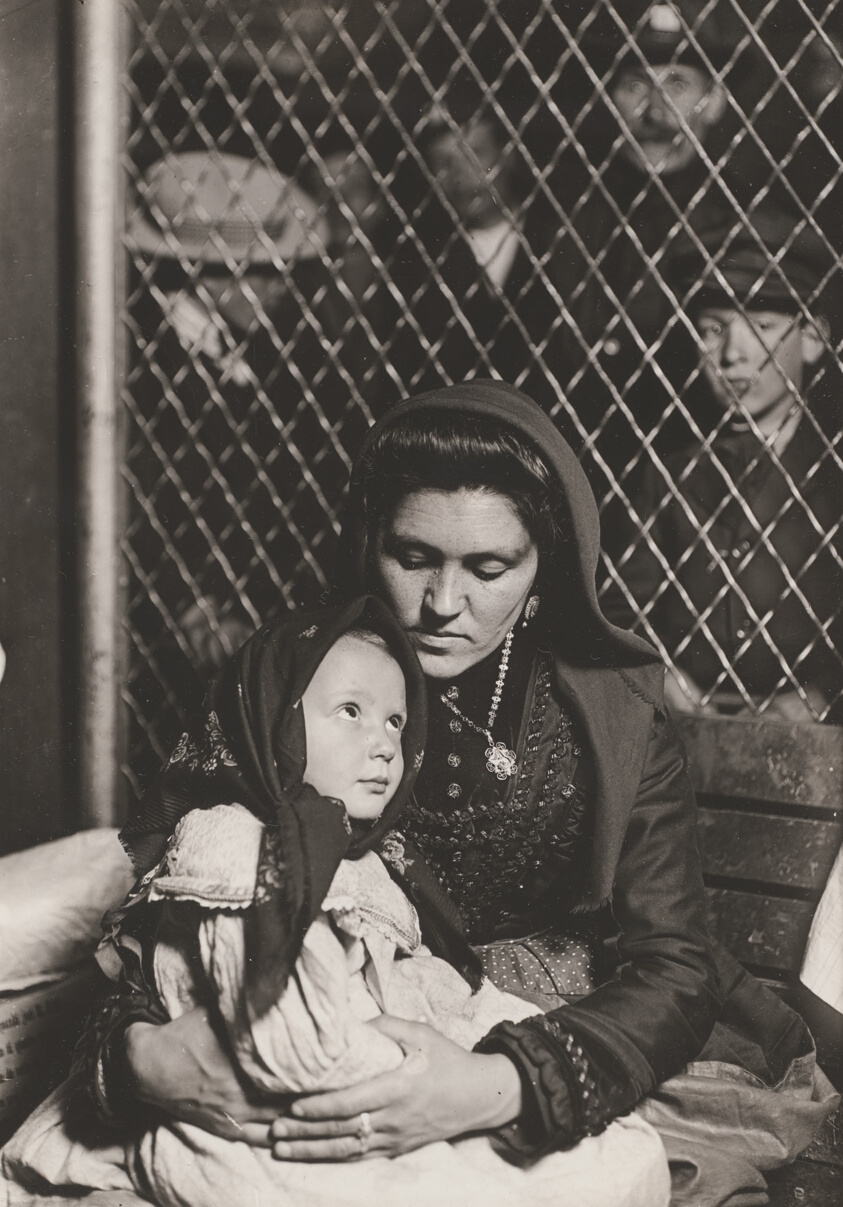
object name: Photograph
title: Immigrant Mother And Child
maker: Lewis Wickes Hine (American, 1874–1940)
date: 1905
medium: Gelatin silver print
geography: United States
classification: gelatin silver (developing-out-paper) pr; photographic process; photography; photograph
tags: mothers, Migration, children, daughters, Collected by Hugh Edwards